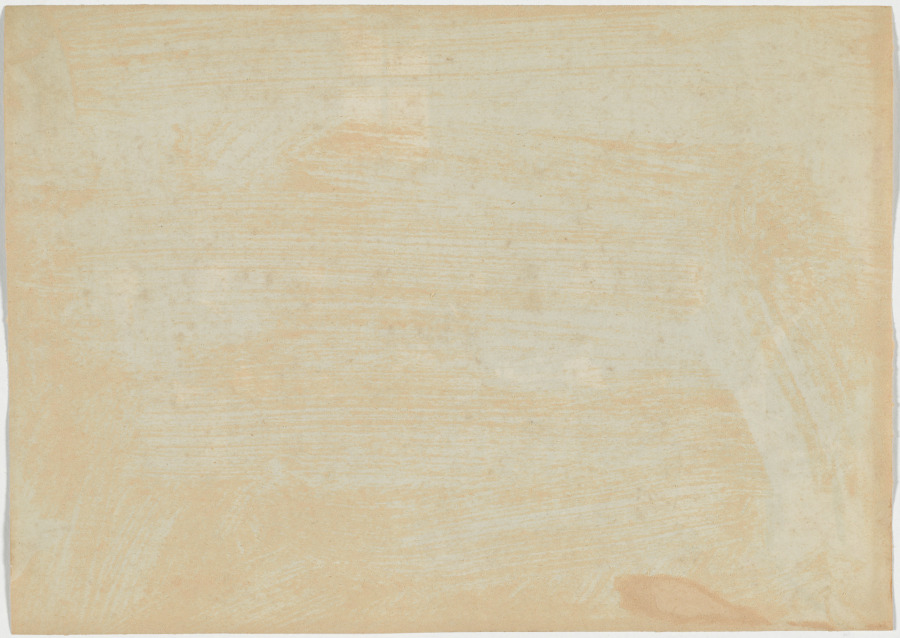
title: Lord Dufferin and the Supreme Council of Government of India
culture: India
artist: Raja Deen Dayal (Indian, 1844–1905)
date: 1887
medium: albumen print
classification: Photograph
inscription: No visible inscriptions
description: Each summer, the British government left the heat of Calcutta for Shimla in the foothills of the Himalayas, where this photograph was taken. In 1885, Deen Dayal began spending his summers there to be near the officials, who were both subjects and clients. The viceroy, or British ruler, of India, Frederick Temple-Blackwood, 1st Marquess of Dufferin and Ava (1826–1902), sits at the center of this staged meeting of the Supreme Council. Deen Dayal made images of Lord Dufferin and his wife, herself an amateur photographer, that led to his appointment as photographer to the viceroy, which resulted in access to other members of the British elite.